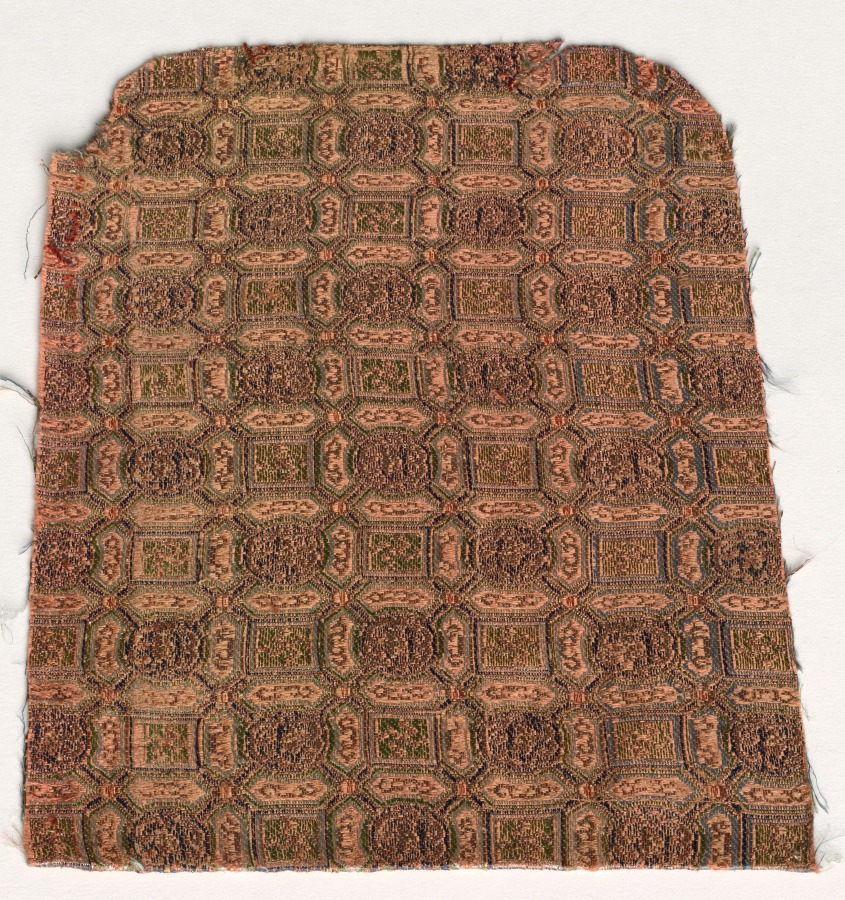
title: Fragment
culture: China, 19th century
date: 1800s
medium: silk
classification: Textile